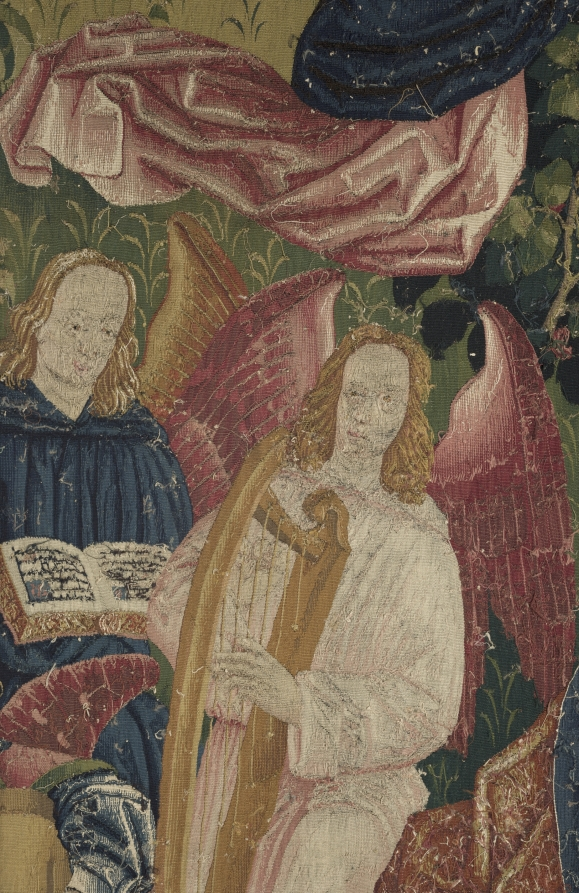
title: The Triumph of Eternity (from Chateau de Chaumont set)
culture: France, Lyon(?), early 16th century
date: 1512–15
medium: silk and wool; tapestry weave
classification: Tapestry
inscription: French verse in Gothic letters translates as follows: "Nothing triumphs by right authority, Unless it be conducted by Eternity. Nothing is permanent beneath the firmament, But above us triumphs Eternity."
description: The Triumph of Eternity is represented by the Coronation of the Virgin. Dressed in crimson velvet with an opulent brocaded velvet shawl, the Virgin is seated in the center as two angels hold a crown over her head. Five musical angels surround her playing an organ, recorder, straight cornetto, harp, and lute, while another sings from an open music book. The scenes in the set display a conservative style in which the figures are placed in shallow landscapes, thereby ignoring pictorial innovations for depicting space and mass. The verse in Old French at the top states: Nothing triumphing by due authority Remains permanent and durable. Nothing is permanent under the heavens, But above, eternity triumphs.